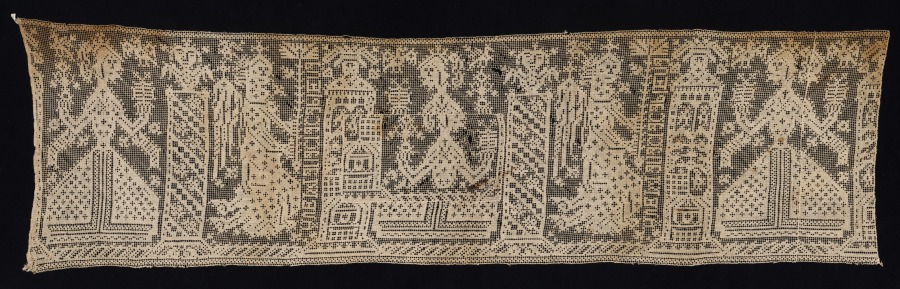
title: Band with Figures of Women and Angels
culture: Italy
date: 1500s–1600s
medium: Bleached linen: needle lace, filet/lacis (knotted ground and darned in two directions)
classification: Lace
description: Likely a religious scene, female figures bear crosses on their chests facing angels playing a keyboard instrument. Later piecing and repairs have distorted the appearance of the central figure to that of a double-tailed mermaid. The top part of her dress has been replaced with an extra bust and set of arms. This is especially visible when comparing the bottom of her dress with the dresses of the far left and far right figures.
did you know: Horizontal writing along the towers can be deciphered as Ave Maria, gratia plena, translated from Latin as Hail Mary, full of grace.